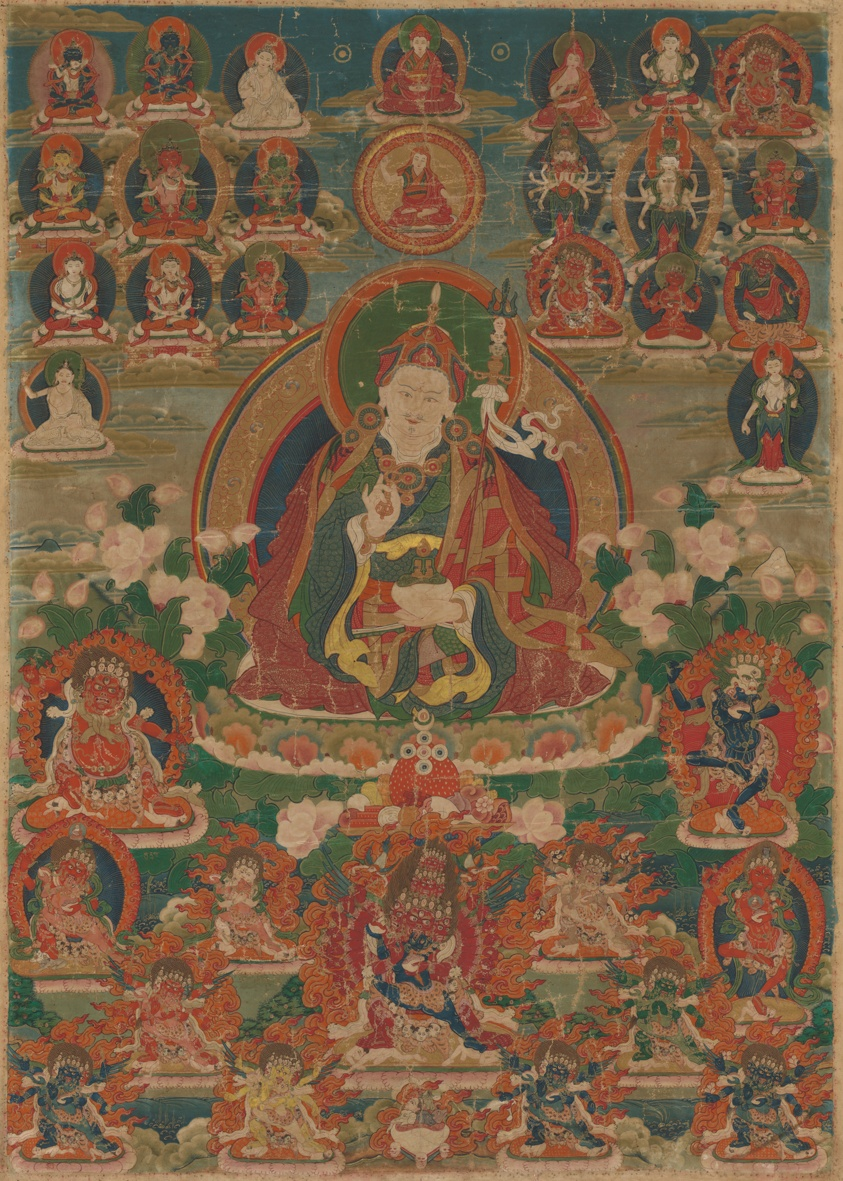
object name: Painting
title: Painted Banner (Thangka) of Sage Guru Padmasambhava Seated Holding a Thunderbolt (Vajra) and Skull Cup (Kapala)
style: Himalayan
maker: Tibet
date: 18th century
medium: Opaque watercolor with some powdered gold on a woven textile support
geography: Tibet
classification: painting; asian art